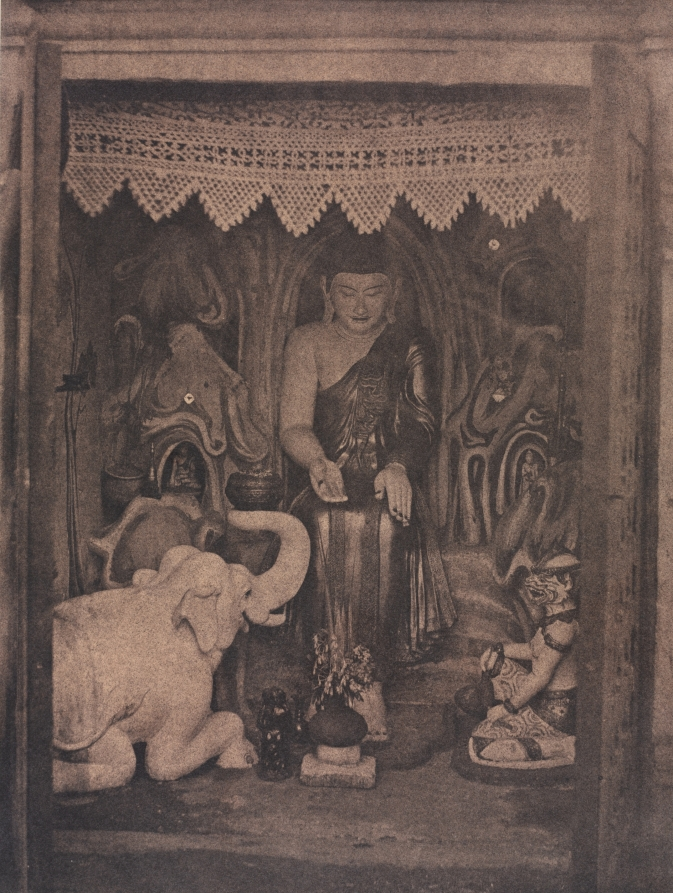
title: Amerapoora. Gautama's Shrine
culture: England, 19th century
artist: Captain Linnaeus Tripe (British, 1822–1902)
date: 1855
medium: albumen print from waxed paper negative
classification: Photograph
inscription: Signed by artist in ink in lower right corner